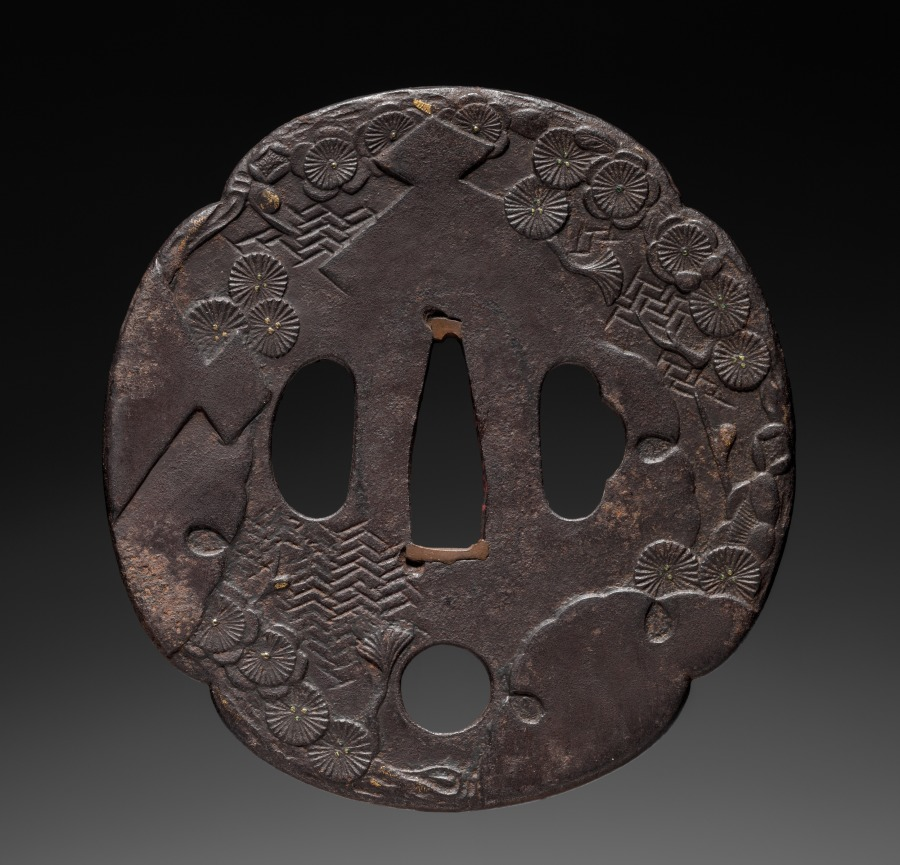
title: Sword Guard (Tsuba)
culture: Japan, possibly Edo period (1615-1868)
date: c. 1615–1868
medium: iron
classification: Arms and Armor